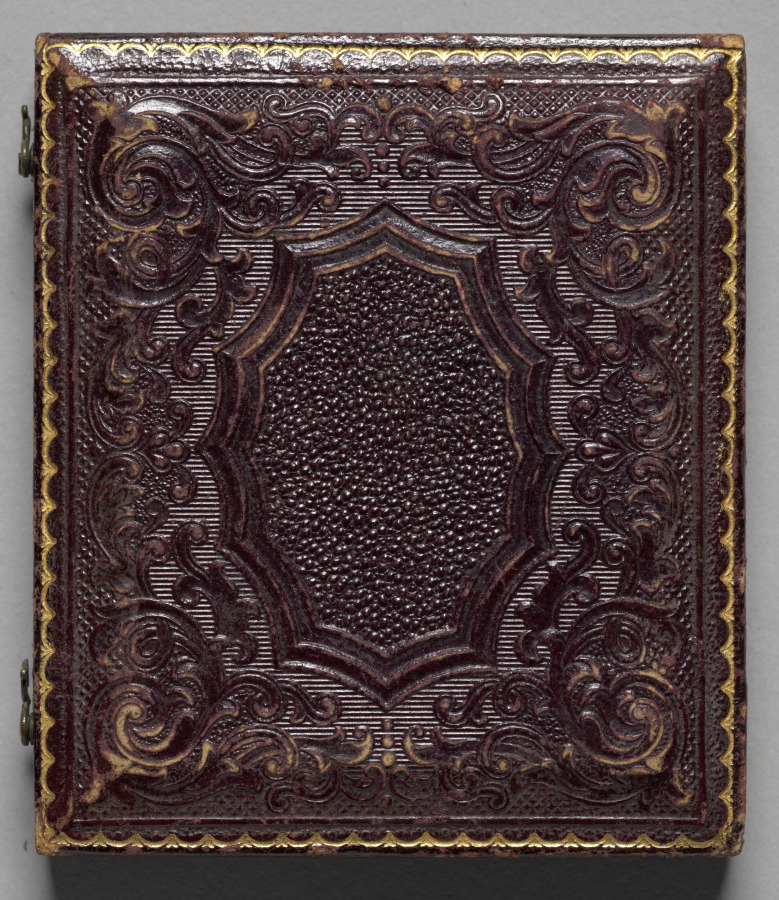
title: Seated couple in mourning attire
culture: America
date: c. 1856–58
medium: daguerreotype, sixth plate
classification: Photograph